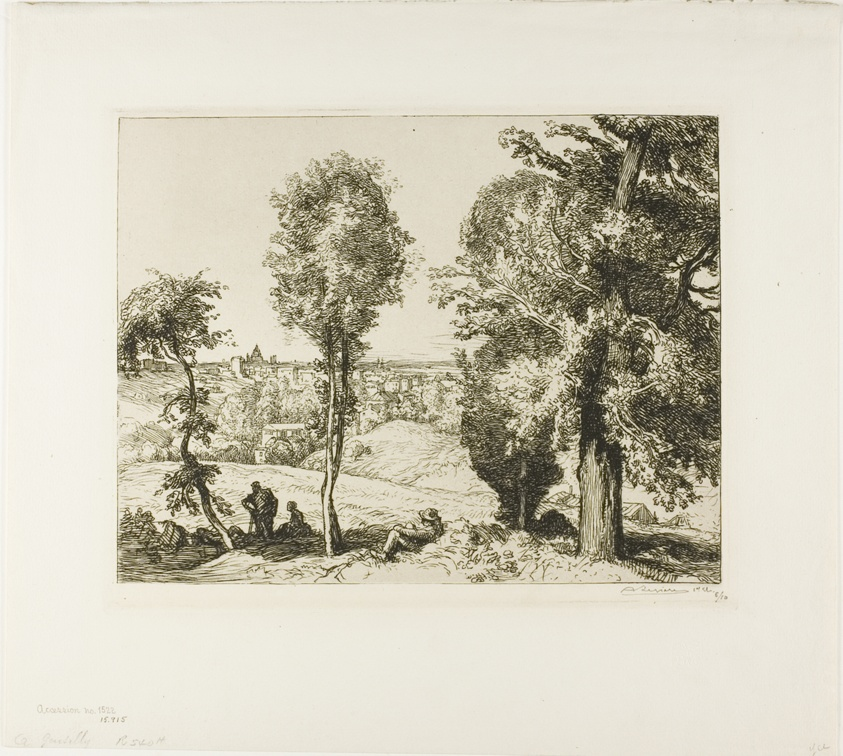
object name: Print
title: To Gentilly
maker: Louis Auguste Lepère (French, 1849-1918)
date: 1910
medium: Etching on cream laid paper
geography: France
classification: etching; print; prints and drawing